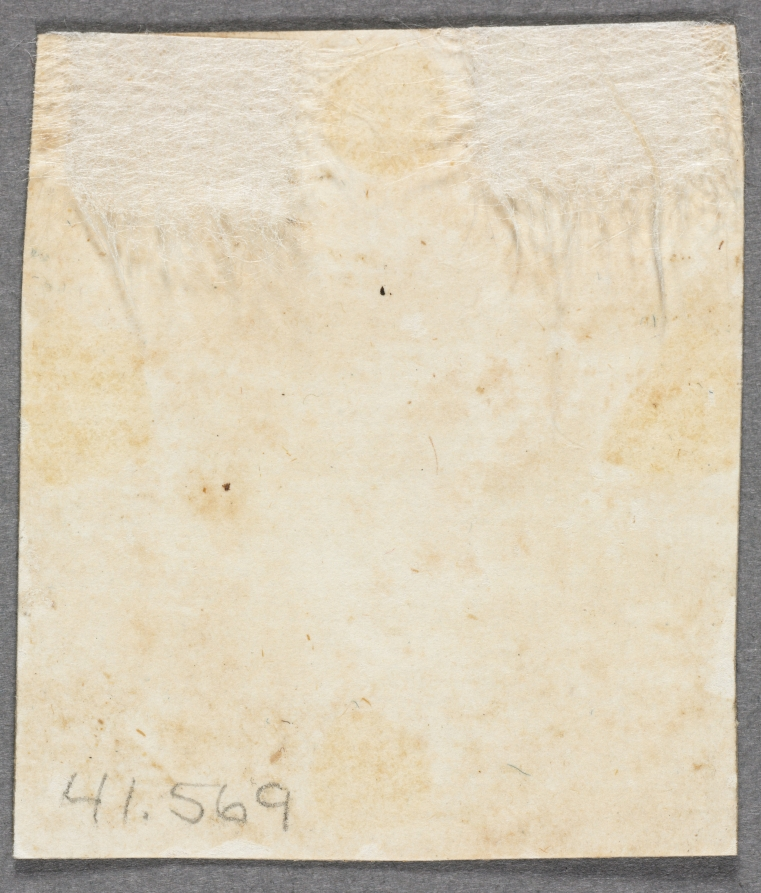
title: Portrait of a Woman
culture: England, 18th century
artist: John I Smart (British, 1741–1811)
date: c. 1772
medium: graphite and wash on laid paper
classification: Portrait Miniature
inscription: inscribed on paper backing: in graphite, upside down at top: 134; in graphite on slant below center: Eleanor of / Spain; on the inside of the outside backing, in center in graphite: M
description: Although it is impossible to say if it was always part of the artist’s process to execute a preparatory sketch prior to painting each miniature, we do know that John Smart retained many hundreds of these sketches. A group of preparatory sketches—of which this portrait is one—descended through the Smirke family after Smart’s daughter Sarah gave a sketchbook containing preparatory portrait studies to her friend Mary Smirke, sister of the celebrated Victorian architect Sydney Smirke. This book was probably broken up around 1877 when it was divided between Sydney’s daughters Mary Jemmett and Mrs. Lange, whose portions were both sold at auction in 1928. This portrait was assigned the historically colorful but fictitious title of “Eleanor of Spain” at some point after memory of its true identity had been lost. Giving illustrious titles to portraits of unknown sitters was a popular strategy adopted by dealers during the nineteenth and twentieth centuries, often applied to miniature portraits and, in particular, to Smart’s sketches of women. The inscription on the paper backing is not in Smart’s hand, and when the paper backing was removed in 1993, no inscriptions were discovered on the back of the drawing itself. Only the sitter’s head and neck are drawn, and a low-necked dress is faintly suggested. Her head is turned to the right, and her light-colored hair is dressed high, with flat curls against the back of her head. She has blue eyes, and the color of her lips is extremely faded, as is the miniature overall. The sitter’s sagging jaw line and the lines beneath her eyes suggest that she was painted as a mature woman. The background is unpainted. A photograph of this sketch in Edward Greene’s notebook indicates that at one time “134” was inscribed on the front in the upper right corner. To this date, the finished ivory for which this preparatory sketch was presumably undertaken has not been discovered. A miniature from the Nelson-Atkins Museum of Art’s Starr collection, while probably not this sketch’s finished ivory counterpart, is closely related in style and date. The Nelson-Atkins unidentified sitter’s veiled hairstyle, position of the head in relation to her squared shoulder, and plump jaw line are identical to the Cleveland sketch. During this stage of Smart’s career, the sitters’ heads were often rather large in relation to their bodies.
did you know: Sketches helped John Smart work out the particulars of a portrait before commencing the miniature on ivory; they were useful in the event that a duplicate might later be required.